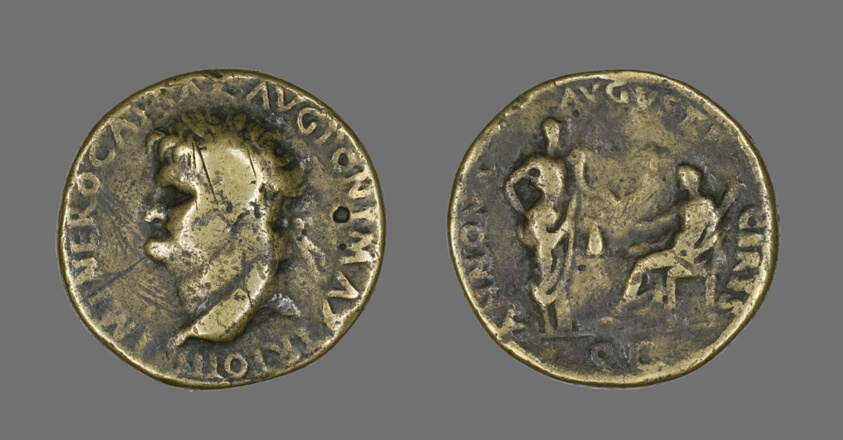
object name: Coin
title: Sestertius (Coin) Portraying Emperor Nero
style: imperial (roman), ancient, roman (ancient, style or period)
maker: Roman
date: 54-68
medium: Bronze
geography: Roman Empire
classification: coin; ancient art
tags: goddesses